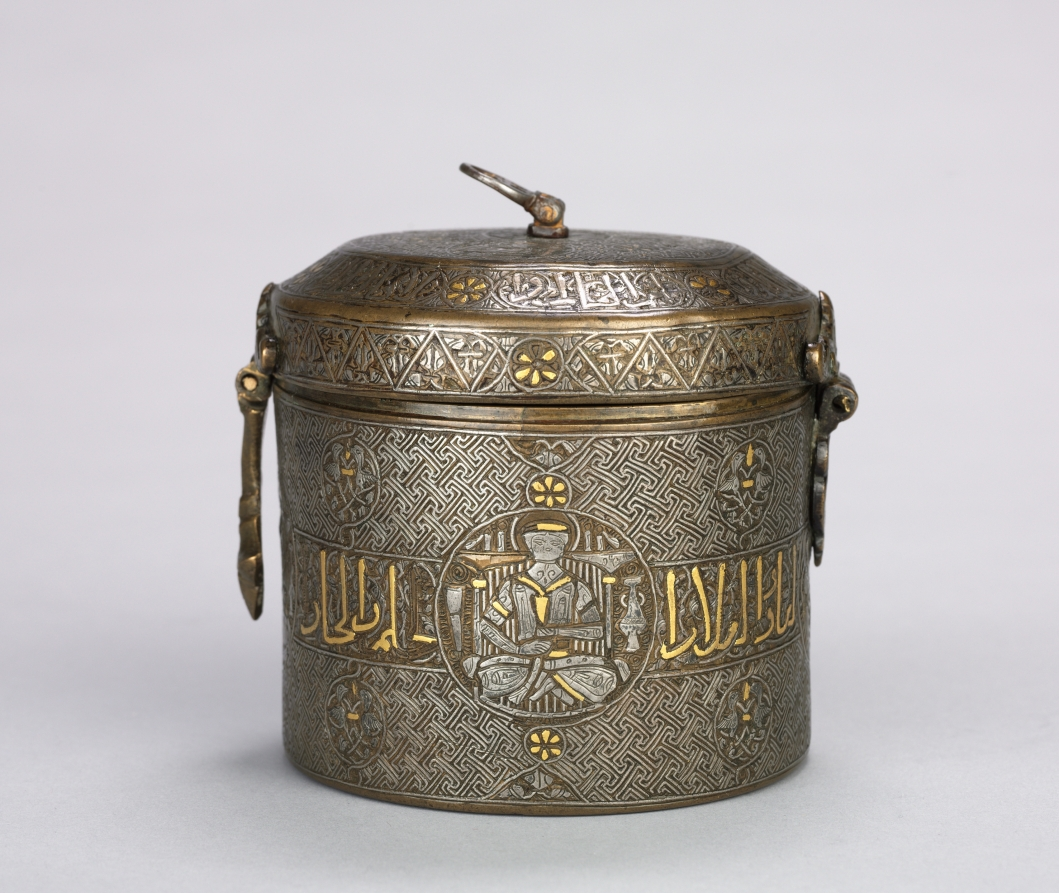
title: Luxury Inlaid Container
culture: Northern Iraq, Ayyubid period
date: c. 1250–1350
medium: sheet brass, inlaid with silver and gold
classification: Metalwork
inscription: Band around body (naskh): "Lasting glory, and safe life, and increasing prosperity, [and] nobility, [and] effective authority"; band around body (naskh): "Brilliance, and nobility, and patience, and modesty, and glory, and long life, and piety, and patience"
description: Metalwork flourished in the 1200s with production centers in Mosul, Damascus, and eastern Anatolia. Along with this container, the nearby ewer and candlestick are examples of the superb pieces produced at this time. Scenes of court life, including banqueting, music, and enthroned figures, decorate the sides and top of the container. The lid is covered in hexagonal swastikas, an ancient solar motif, which is further enhanced by a large sunburst in the center. The calligraphic inscriptions extend wishes for a long life, prosperity, and patience to the owner.